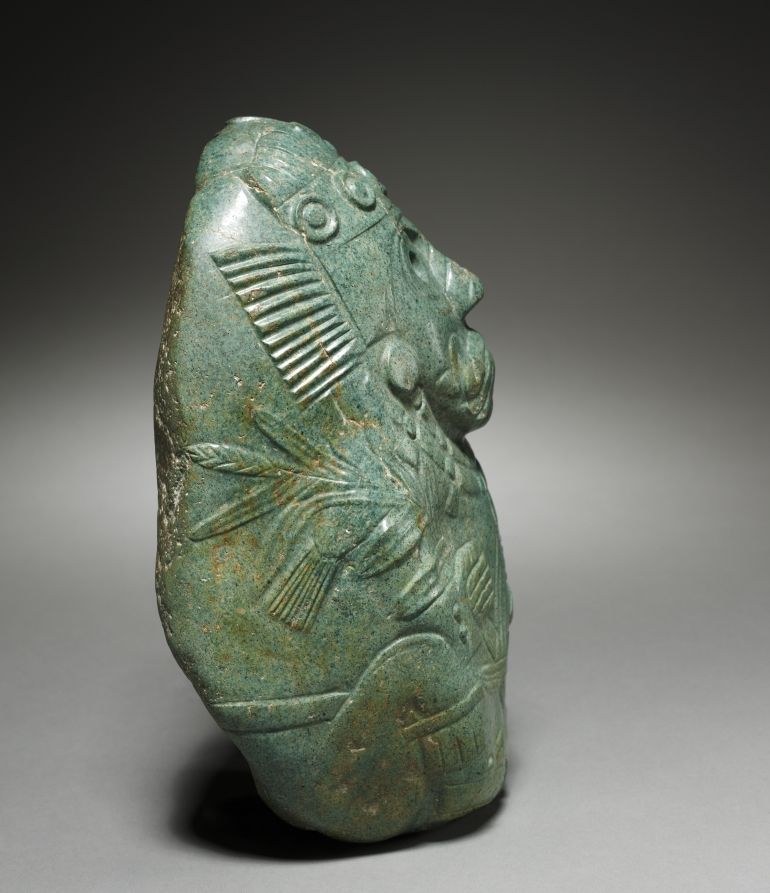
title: Tlaloc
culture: Central Mexico, Aztec, 13th-16th century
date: c. 1200–1519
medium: stone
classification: Sculpture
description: A natural cobble of greenstone has been smoothed and carved in low relief to portray the Aztec rain god Tlaloc, recognizable by his ringed eyes, twisted nose element, and fanged mouth. As the provider of water, Tlaloc is a patron of agriculture and holds a stalk of maize in one hand. To the Aztecs, Tlaloc was an ancient and civilized god; his worship could be traced back to the ancient ruined site Teotihuacan.